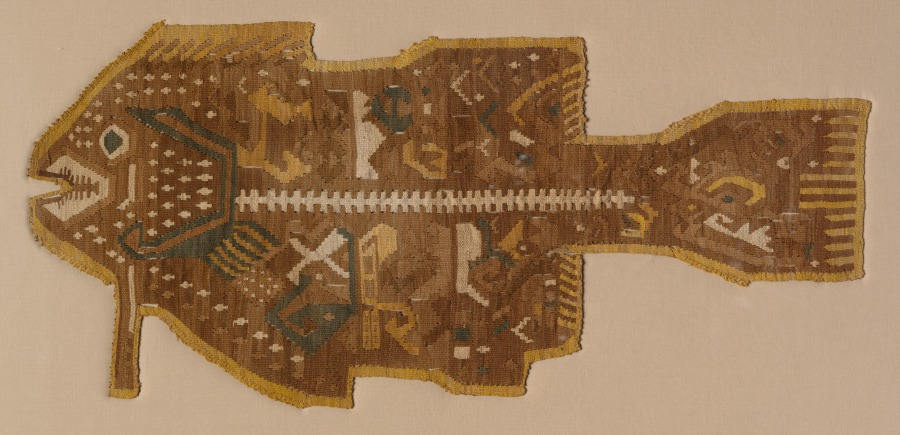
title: Fish-Shaped Applique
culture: Central Andes, Central Coast, Ychsma (Pachacamac) people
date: 1400–1532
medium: cotton and camelid fiber, tapestry weave with areas of eccentric weft floats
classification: Textile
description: This fish-shaped textile was originally stitched with others like it to a mantle, a shawl-like garment that was a staple of Andean clothing. Its partial “X-ray view,” which emphasizes the bony spine, is unique to the style of the Ychsma (yeach-mah), who lived on Peru’s central coast. In addition to referencing sources of food, marine subjects may also carry religious associations, as some coastal peoples of the period regarded the sea as a deity.